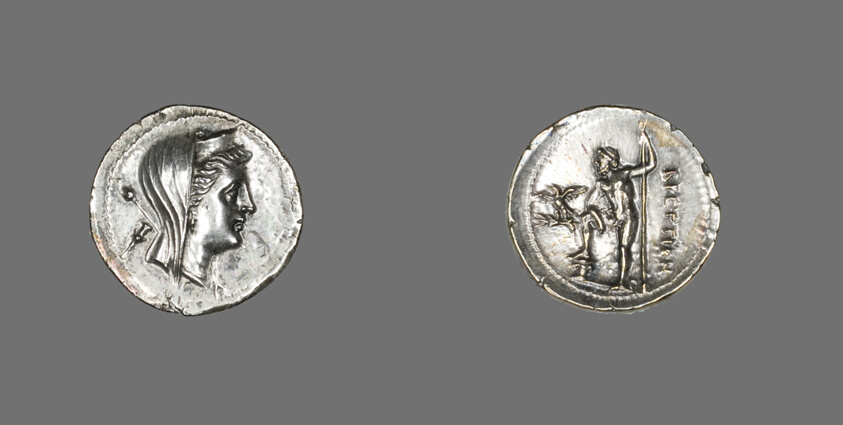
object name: Coin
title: Drachm (Coin) Depicting the Nymph Amphitrite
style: greek, archaic (greek)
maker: Greek, minted in Kroton/Bruttium, Italy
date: 216-203 BCE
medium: Silver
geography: Italy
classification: coin; ancient art